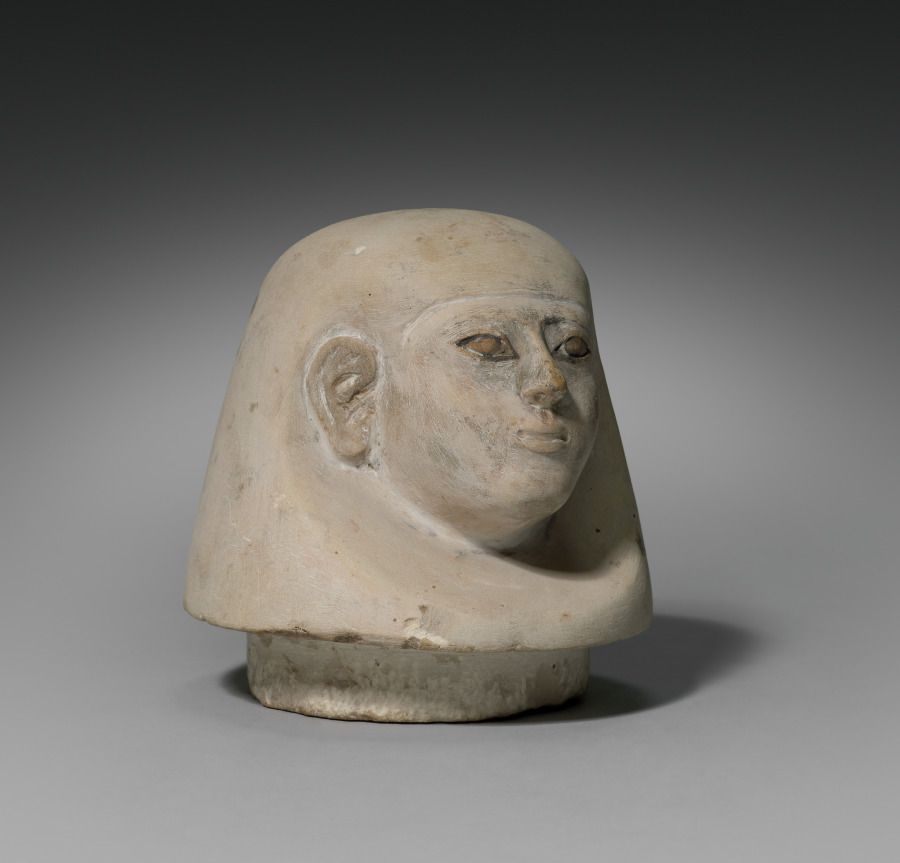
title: Canopic Jar with Lid (lid)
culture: Egypt, New Kingdom (1540–1069 BCE), Dynasty 18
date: 1540–1296 BCE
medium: limestone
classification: Funerary Equipment